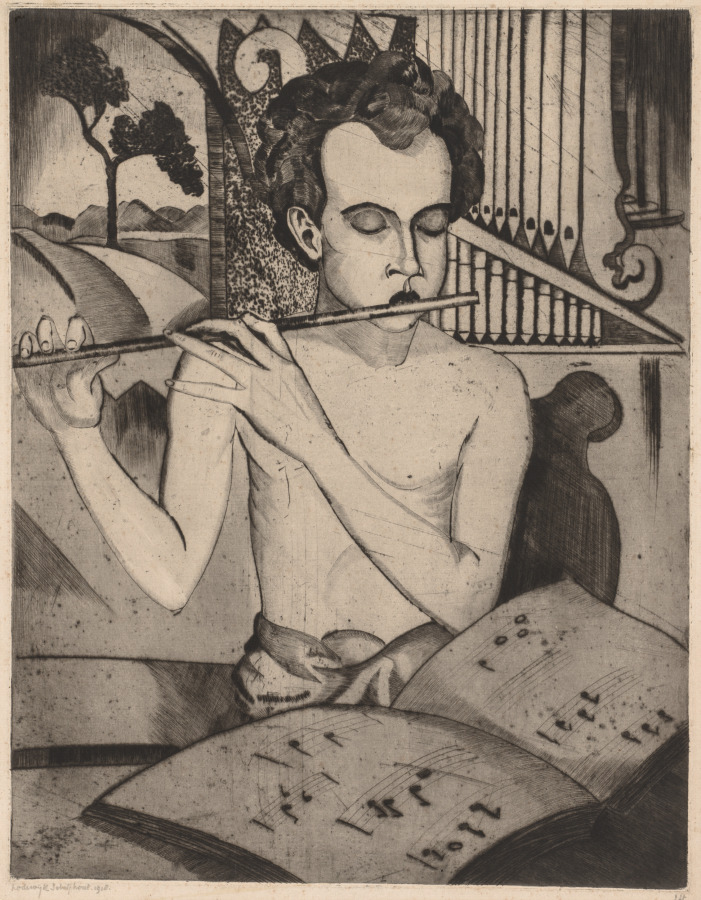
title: Flute Player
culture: Netherlands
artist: Lodewijk Schelfhout (Dutch, 1881–1943)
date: 1918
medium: drypoint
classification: Print